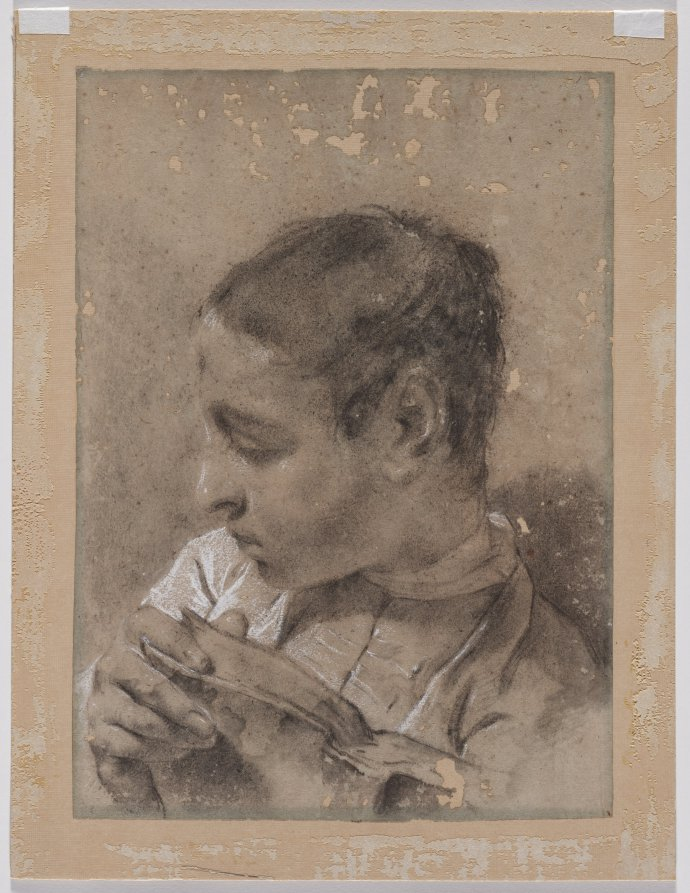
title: Head of a Young Man in Profile with a Book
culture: Italy, 18th century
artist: Giovanni Battista Piazzetta (Italian, 1682–1754)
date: c. 1730/40s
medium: black chalk, stumped, heightened with white chalk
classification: Drawing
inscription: VERSO OF SECONDARY SUPPORT, lower center, in graphite: piazzett [sideways] ; lower right, in graphite: -piazetta -